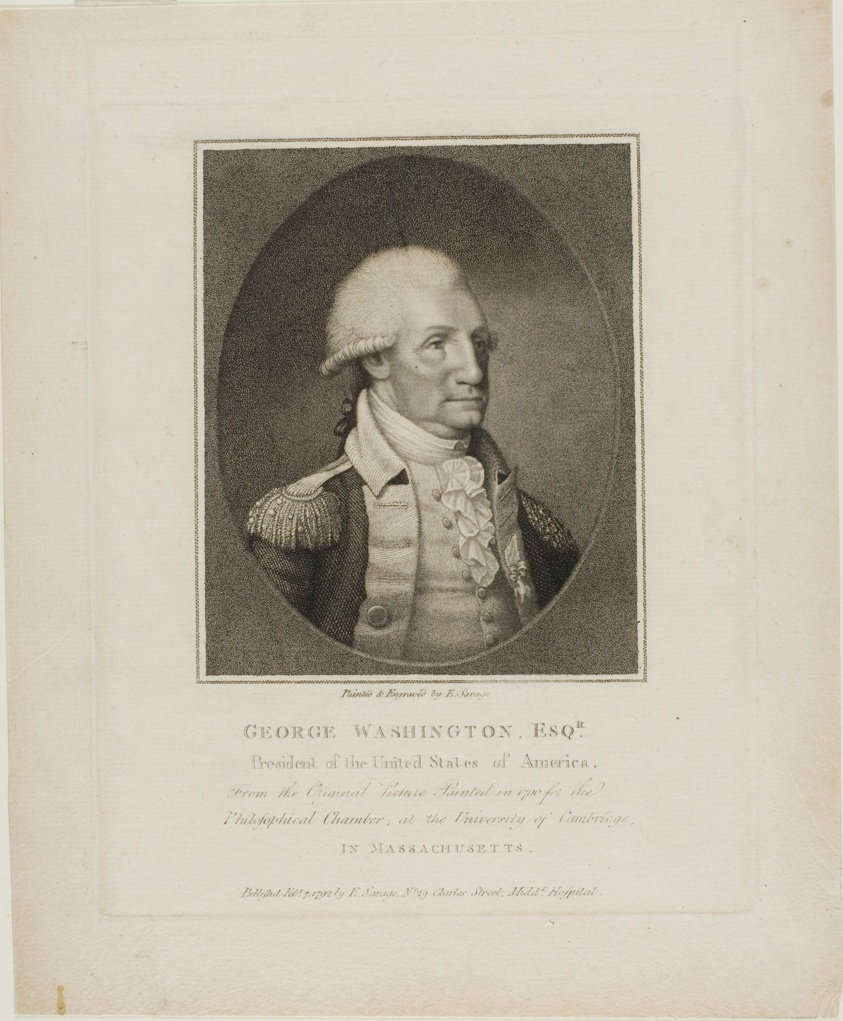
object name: Print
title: George Washington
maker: Edward Savage (American, 1761–1817)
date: c. 1792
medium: Engraving on ivory wove paper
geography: United States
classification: wood engraving; print; prints and drawing